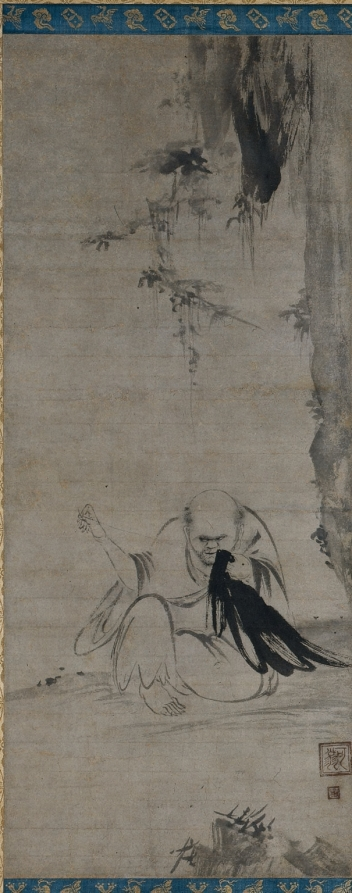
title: Monk Mending Clothes in the Morning Sun (Chōyō Hotetsuzu)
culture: Japan, Nanbokuchō period (1336–92)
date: c. 1350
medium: hanging scroll; ink on paper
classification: Painting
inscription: Seals: Kaō, Ninga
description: This painting illustrates the Zen ideal of cultivating one’s spirit through all moments of life, from the mundane to the marvelous. The monk pictured is simply mending his robes, but it is a meditative activity. A “mending clothes” image would typically form a pair with another on the theme of “reading by moonlight.” While the seals on the painting were added at a later date, similar seals appear on other ink figures and bird-and-flower compositions.